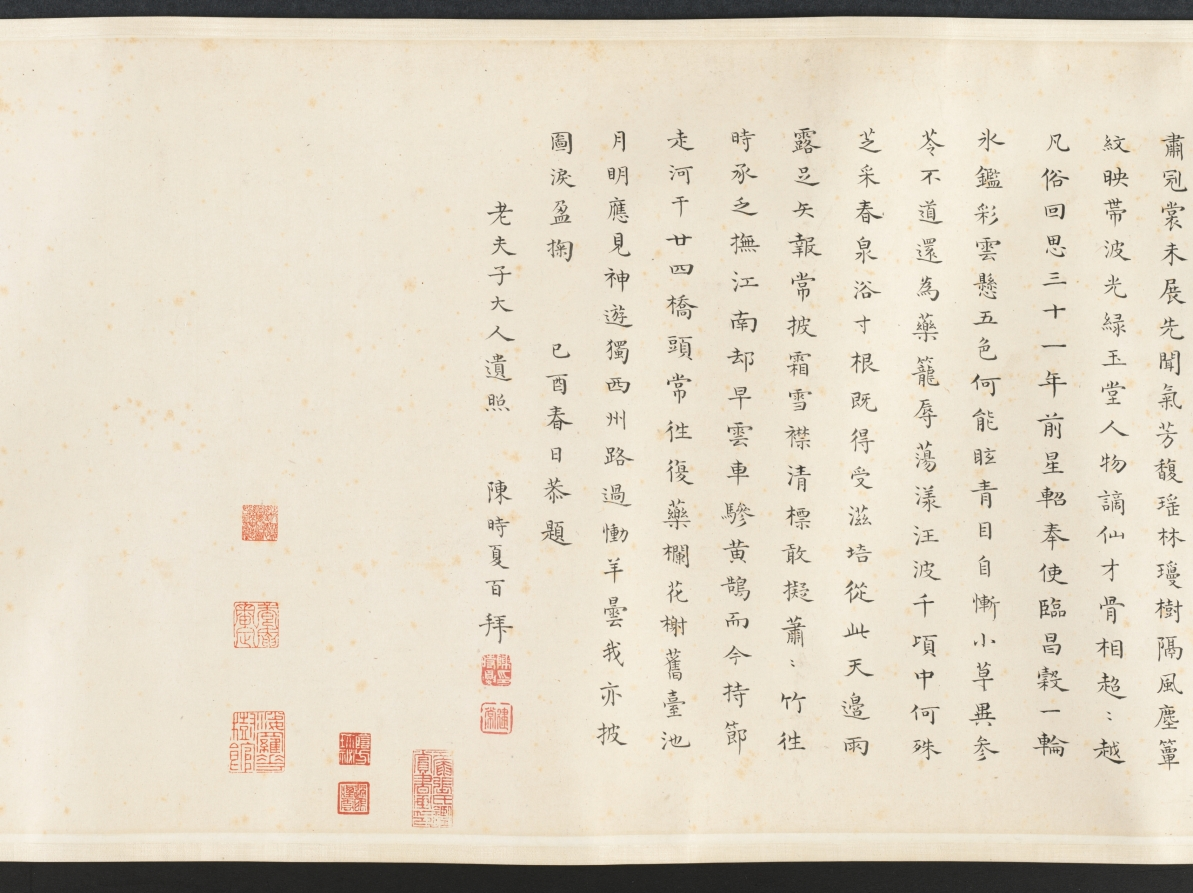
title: Cleansing Medicinal Herbs in the Stream on a Spring Day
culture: China, Qing dynasty (1644-1911)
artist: Yu Zhiding (Chinese, 1647–c. 1716)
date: 1703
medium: Handscroll; ink and color on silk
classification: Painting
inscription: Title by Chen Yixi.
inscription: 姑射仙人冰雪膚，新詩傳唱滿通都。/ 極知遲暮難為別，更展春泉洗藥圖。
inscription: Colophon by Chen Tingjing 陳廷敬 (1639–1712). Colophon by Wang Hongxu 王鴻緒 (1645–1723), dated 1707. Colophon by Song Luo 宋犖 (1634–1714). Colophon by Liu Yan 劉巗. Colophon by Jing Xikui 涇西夔. Colophon by Liu Yan 劉巗. Colophon by Cao Yin 曹寅. Colophon by Wang Shihong 汪士鋐. Colophon by Wang Shidan 王式丹 (1645–1718), dated 1712. Colophon by Shi Shenyi 史申義 (1661–1712), dated 1712. Colophon by Yin Yuqing 殷餘慶, dated 1712.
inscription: Colophon by Chen Shixia 陳時夏, dated 1729.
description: A famous portraitist, Yu Zhiding here depicts the likeness of Shi Shenyi 史申義 (1661–1712), an official and poet. Master Shi, a sickly man, was deeply interested in medicinal science. The opening section of the scroll features a boy washing a fungus in fresh spring water, a basket of medicinal herbs by his side. Other servants carry a fan, a bundle of scrolls, and a cup of tea or hot wine. Master Shi sits in a bamboo grove, surrounded by fields of herbs. Returning swallows, pink peach blossoms, and blooming magnolia indicate spring, whereas the fungus conveys wishes for long life. The spring theme may express the artist’s wish for his friend’s recovery.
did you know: In the pavilion are some of Shi Shenyi’s scholarly accoutrements: a stack of books, an antique zun 尊 (wine vessel), a brush holder, an ink stone, and a small chime.